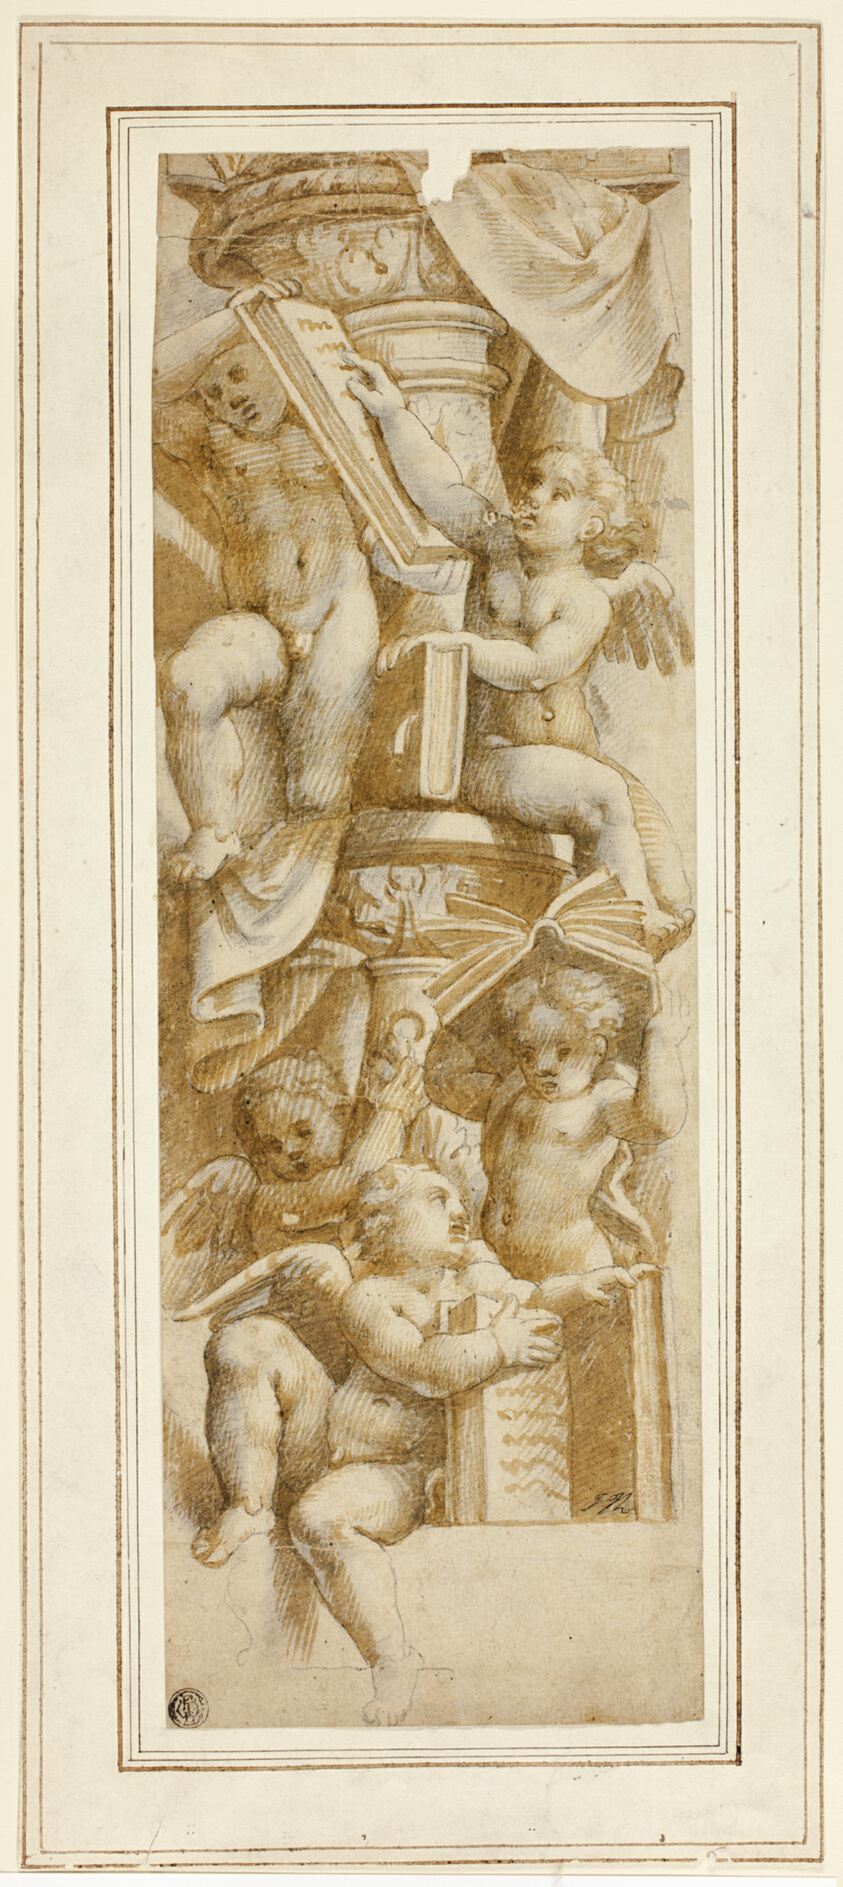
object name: Drawing and Watercolor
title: Five Putti with Books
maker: After Bernardino Gatti, called Il Sojaro; Italian, c. 1495-1575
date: c. 1543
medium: Brush and brown wash, with black chalk, on cream laid paper, tipped onto ivory laid paper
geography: Italy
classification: ink with wash; drawings (visual works); prints and drawing